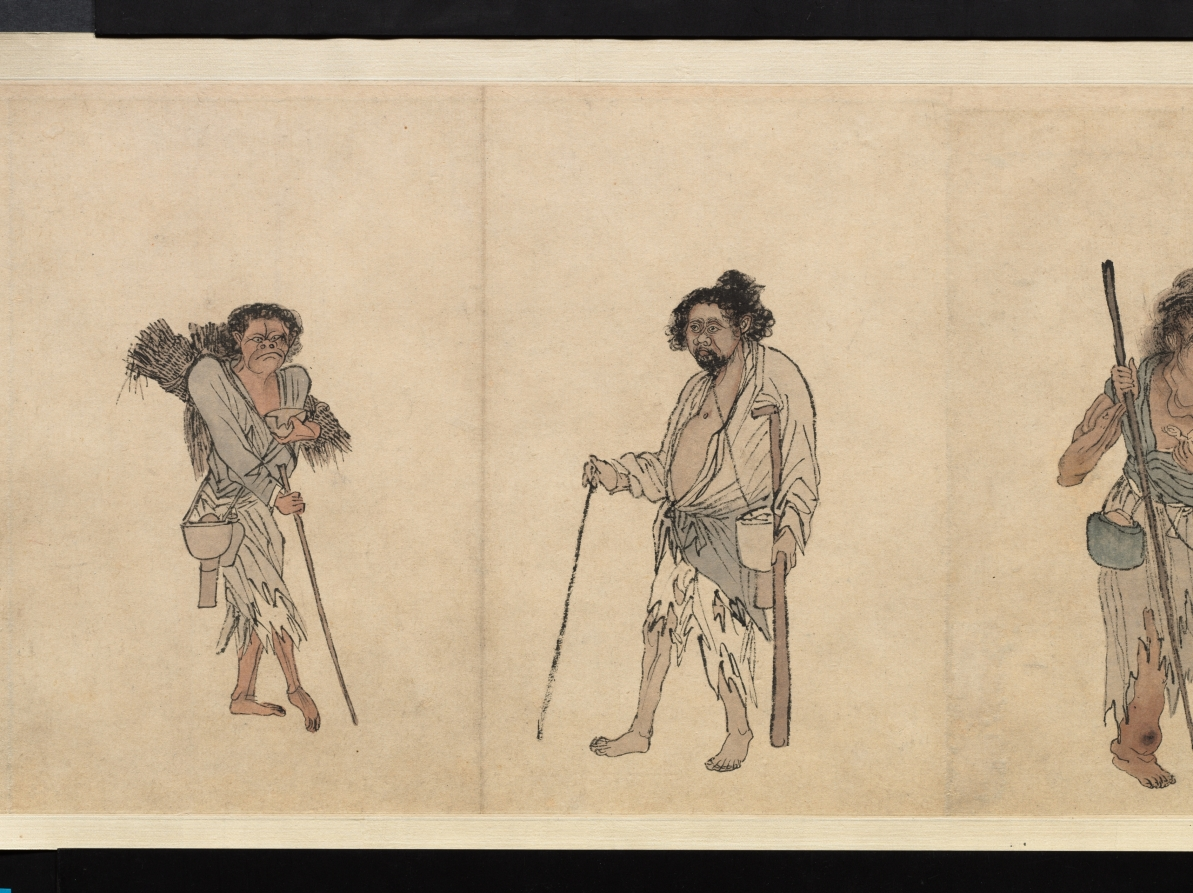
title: Beggars and Street Characters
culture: China, Ming dynasty (1368–1644)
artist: Zhou Chen (Chinese, c. 1450–c. 1536)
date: 1516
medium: Handscroll; ink and light color on paper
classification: Painting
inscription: 題: 周臣流氓圖. 古堇趙鶴琴 [印] 老鶴臨池; 鵝池軒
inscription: 正德丙子秋七月，閒窗無事 ，偶記素見市道丐者種種態度。乘筆硯之便，率爾圖寫。雖無足觀，亦可以助警勵世俗云。 東邨周臣記 [印]東邨; 舜卿; 鵝場散人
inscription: 吳中東邨周君，善丹青，尤長於人物。此圖其所見盛市丐者之狀種種，各盡其態，觀者絕倒。嗟乎，今之晝夜乞哀以求富貴者，安得起周君而貌之耶。臥雲徵君出示，余漫題其後。 甲子歲十月吳門黃姬水 [印] 士雅山人; 另一印不詳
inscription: 是冊凡數種。其飢寒流離疲癃殘疾之狀，種種之異。觀此而不惻然心傷者，非仁人也。計正德丙子逆瑾之流毒已數年。而[江]彬 [錢] 寧輩肆虐方熾。意分符剖竹諸君，亦鮮有能撫字其民者。然則舜卿此作，殆與鄭君 流民圖同意。其有補於治道者不淺，要不可以墨戲忽之也。 長洲張風翼題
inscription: 東村此筆，蓋圖寫飢寒乞丐之態，以警世俗耳。而質山 [黃姬水]欲其寫昏夜乞哀，而靈墟[張鳳翼]則擬之於安上門圖。二君之見，其各有所指哉。昔唐六如每見周筆，輒稱曰：周先生！蓋深服其神妙之不可及。若此冊者，信非他人可能而有符於六如之心伏矣。豈易得耶。若黃、張之指，則又論於畫之外，不在於形似筆墨之旨也。 萬歷丁丑十二月三日 茂苑文嘉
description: Zhou Chen from Suzhou provides rare depictions of impoverished people that once filled the city’s markets and streets. Despite Suzhou’s prosperity, its rapid growth polarized society, including the wealthy and those who had deserted their farmlands, who were without homes, unemployed, or sick. Amid these are figures who inspire fear rather than empathy. The painting may thus be informed by local practices at the end of the lunar year, in which street beggars, in exchange for food or money, would dress up like ghosts and demons to drive out evil forces.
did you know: Although Zhou Chen's original composition was an album of 24 figures, today it is mounted as two handscrolls, one in the Cleveland collection and one in the Honolulu Museum of Art.